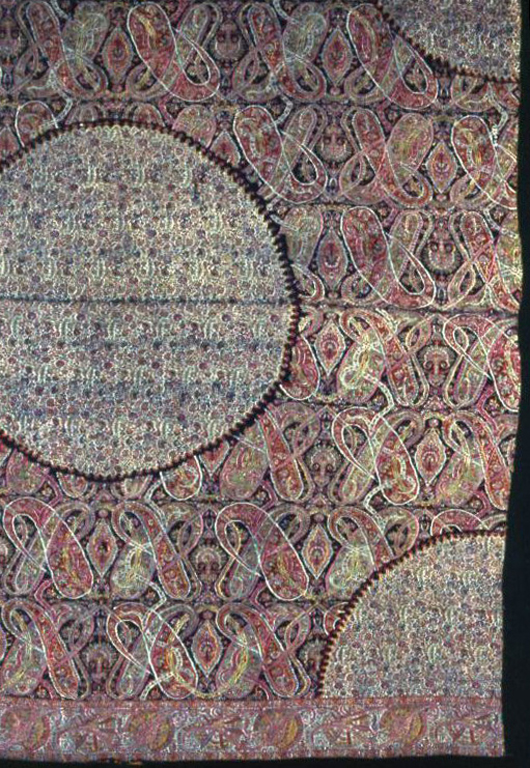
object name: Costume and Accessories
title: Shawl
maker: India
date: c. 1830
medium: Wool, double interlocking 2:2 'S' twill tapestry weave; ends of 2:2 twill weave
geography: India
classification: textile; weaving; costume